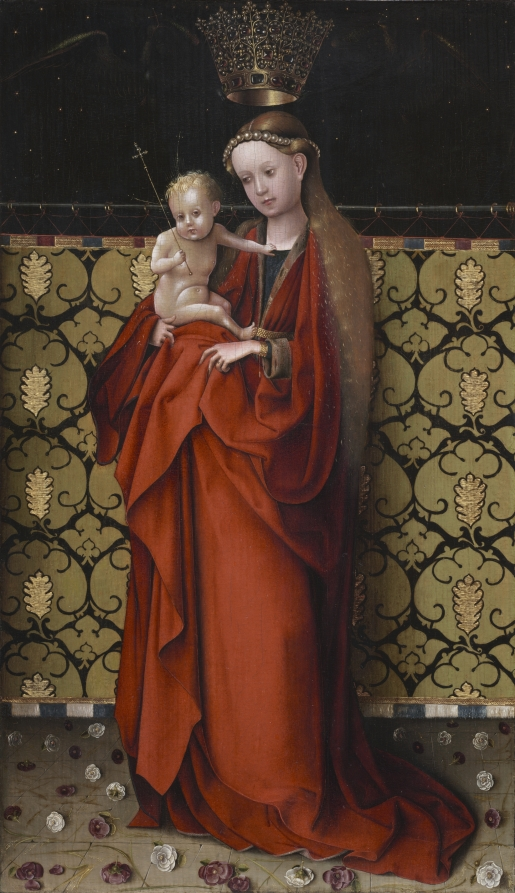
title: The Virgin Crowned by Angels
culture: Germany, Cologne, 15th century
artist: Stefan Lochner (German, 1400-c. 1452)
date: c. 1450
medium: oil on wood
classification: Painting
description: Two angels, barely visible against a dark background, crown Mary as the Queen of Heaven. Her slight features are made more substantial by her elaborately draped, brilliant crimson mantle. Holding the Christ child, she stands on a floor scattered with red and white roses, symbols of her purity. Green palmettes enriched with costly gold thread decorate the velvet. Since silk velvet was not woven in the north, Italian velvets were frequently depicted in northern paintings during the 1400s. Lochner is thought to have come from Meersburg in southwest Germany, and is recorded as being in Cologne by 1442, where he was paid for decorations in connection with the celebration of the visit of Emperor Frederick III. He was elected town councillor by the painters’ guild in 1447 and 1450. There are no records of him after 1451.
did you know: Although they are barely visible, two angels are holding the crown above the figure of Mary.